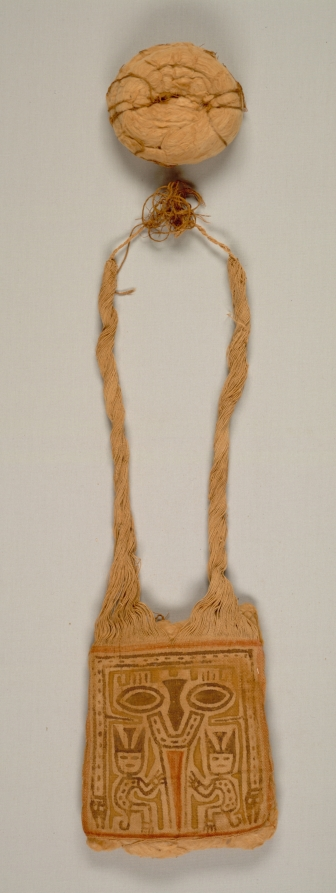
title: Mummy Bundle "Mask"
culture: Peru, South Coast, Ica Valley, Ocucaje site, Paracas style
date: 200–1 BCE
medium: cotton and pigment, plain weave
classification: Textile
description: The Paracas people buried their dead in pear-shaped mummy bundles, created by carefully wrapping the seated human body in layers of garments and other textiles. Sometimes a painted cloth was placed on the outer layer at the top of the bundle, as though it served as the bundle’s face, head, or “mask.” Some cloths were painted with masklike faces, although others—such as this example—feature complete figures, which may be mythological beings with supernatural appendages.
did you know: These masks fall into two categories, those with only a face and those with a full-bodied figure.